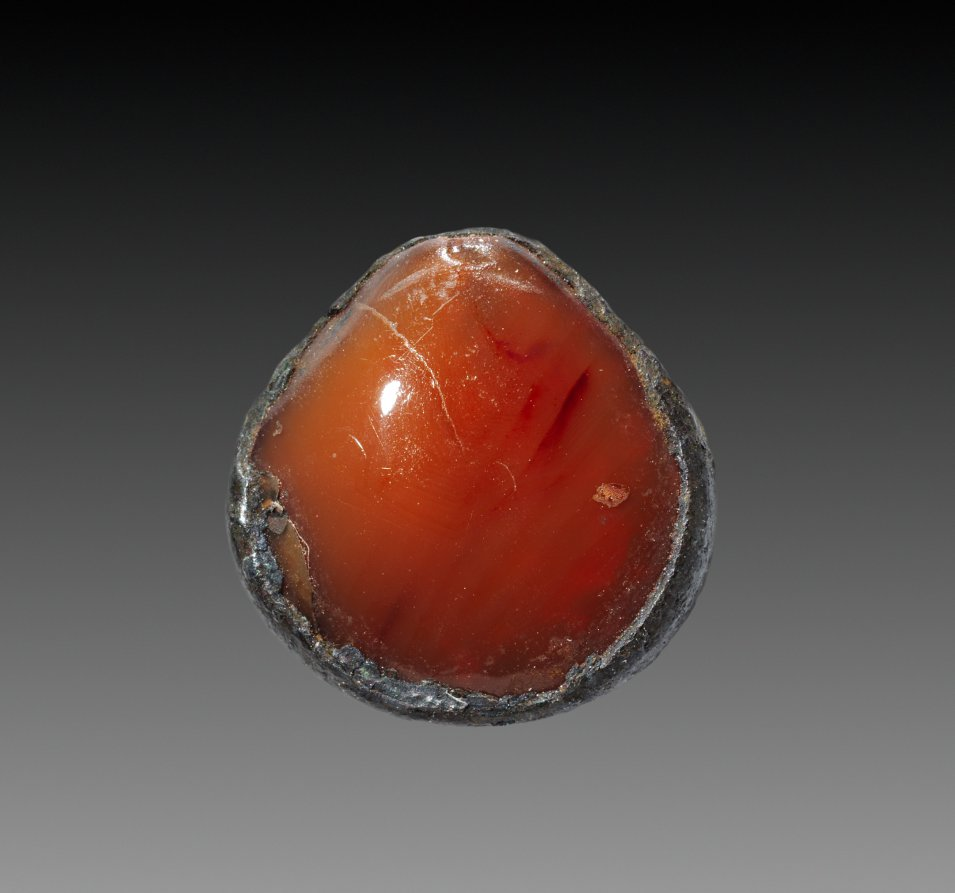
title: Oyster-Shell Pendant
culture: Egypt, Middle Kingdom (2040–1648 BCE), Dynasty 12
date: 1980–1801 BCE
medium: carnelian and silver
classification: Jewelry